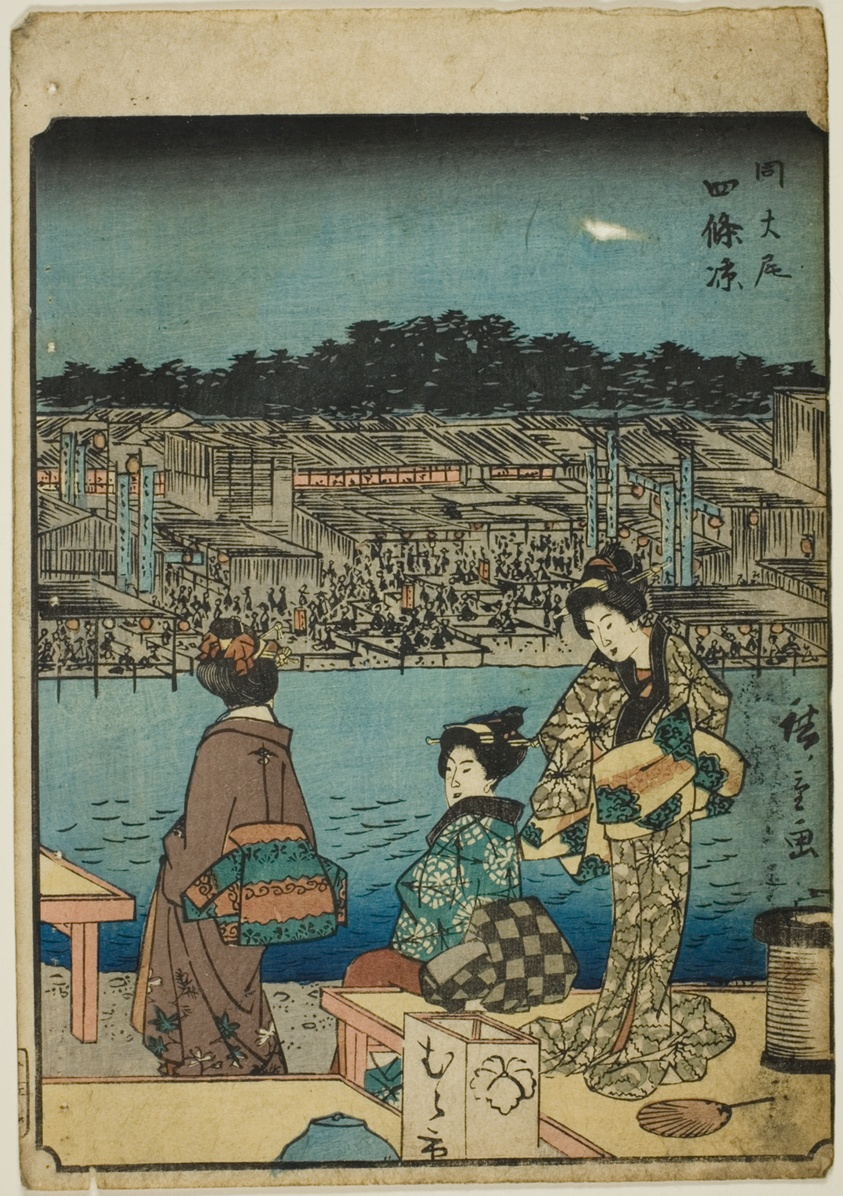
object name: Print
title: Kyoto: Evening Cool at Shijo (Onajiku taibi, Shijo suzumi), from the series "Fifty-three Stations [of the Tokaido] (Gojusan tsugi)," also known as the Figure Tokaido (Jinbutsu Tokaido)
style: Japanese (culture or style)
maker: Utagawa Hiroshige 歌川 広重; Japanese, 1797-1858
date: 1852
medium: Color woodblock print; chuban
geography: Japan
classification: woodblock print; print